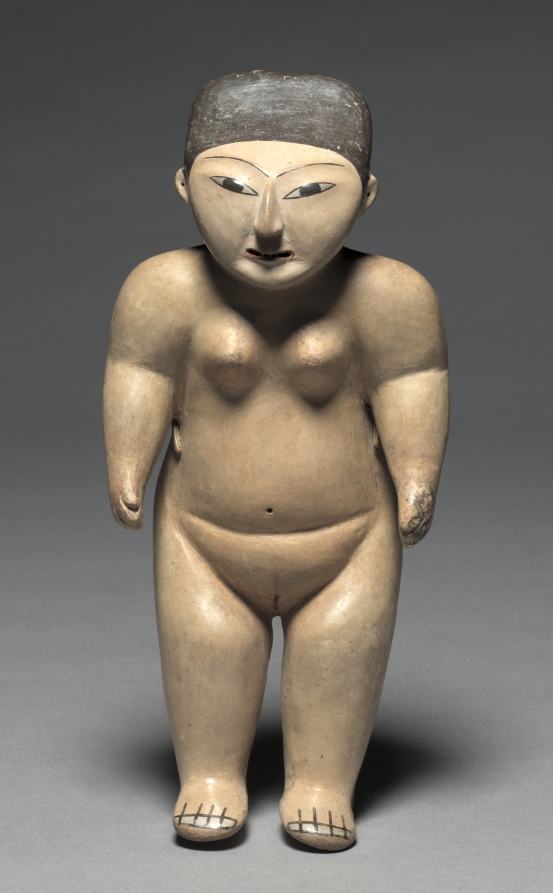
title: Female Figure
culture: Peru, South Coast, Nasca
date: 100 BCE–700 CE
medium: earthenware with colored slips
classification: Sculpture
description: This figure, which may once have worn small garments, might be a tomb offering. Her tapered head reflects the practice of cranial shaping, which may identify her social group and serve as a mark of beauty. Her fleshy hips likely refer to human and plant fertility, since food is the source of such bodily wealth. Her identity is unknown.